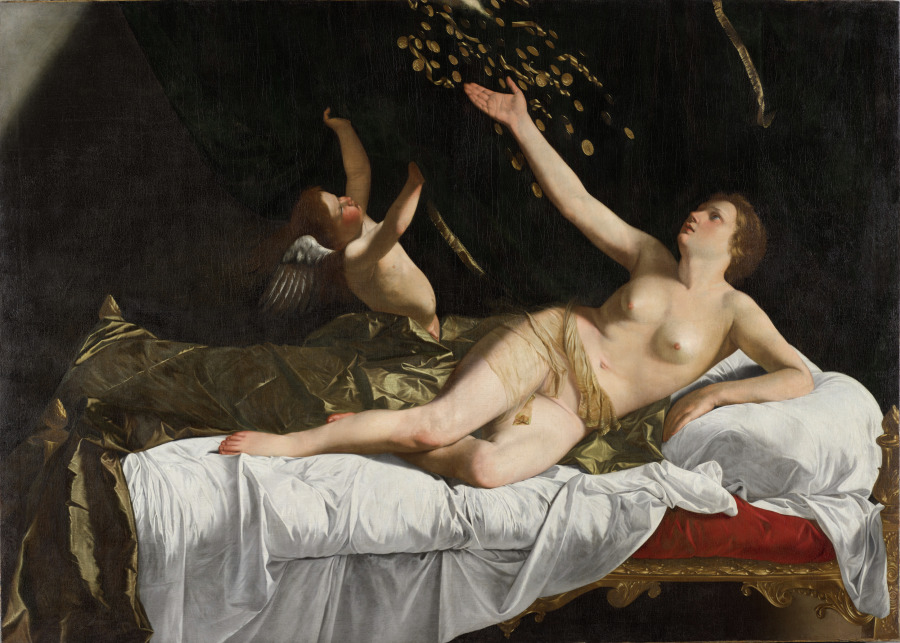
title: Danaë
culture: Italy, 17th century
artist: Orazio Gentileschi (Italian, 1563–1639)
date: c. 1623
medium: oil on canvas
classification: Painting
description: Danaë’s father feared a prophecy that his grandson would kill him, so he imprisoned his daughter to protect her from suitors. Yet Jupiter, king of the gods, fell in love with Danaë, and he came to her in the form of gold streaming from the sky. Gentileschi adopted Caravaggio’s method of painting directly from models, pulled to the front of the picture plane, which gives the painting a startling, tangible quality. However, the graceful way he handled paint and human gestures lends the work a poetic quality unique to the artist.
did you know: The gauzy scarf draped over Danaë was a studio prop present in many of Orazio's paintings.